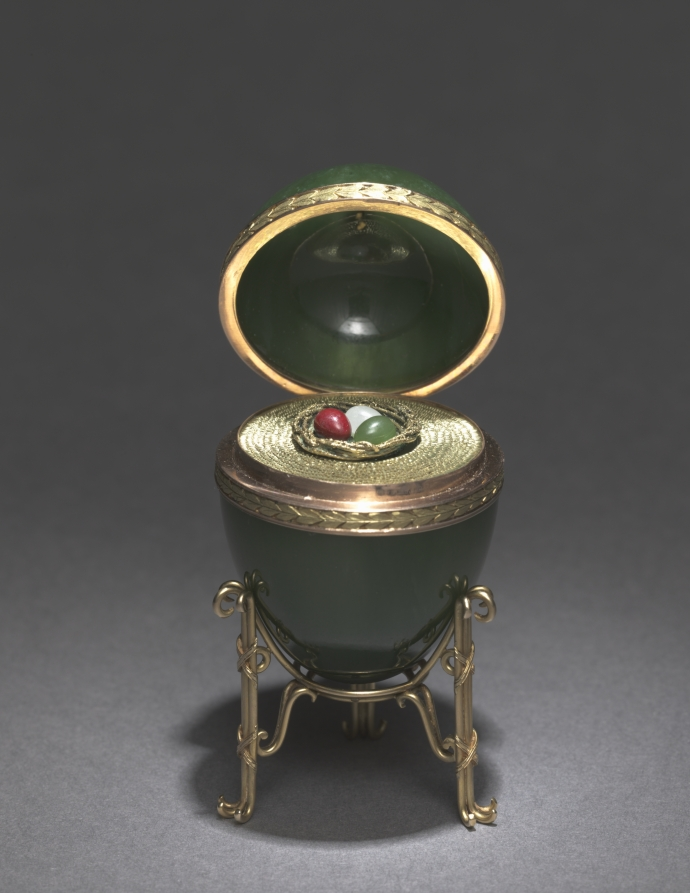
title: Easter Egg on Stand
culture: Russia, St. Petersburg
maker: attributed to House of Fabergé (Russian, 1842–1918)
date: c. 1900–1910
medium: jade mounted in gold, cabochon rubies, jade and purpurine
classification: Miscellaneous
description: Seated on an intricate miniature stand, this polished nephrite (jade) egg features a cabochon ruby on top and a hinged gold-leaf border that reveals the interior. Within the egg, on a bed of gold, is a nest of even smaller eggs. Each red, white, and green egg mirrors an aspect of the larger egg, recalling the cleverness and meticulous details found within every House of Fabergé object.